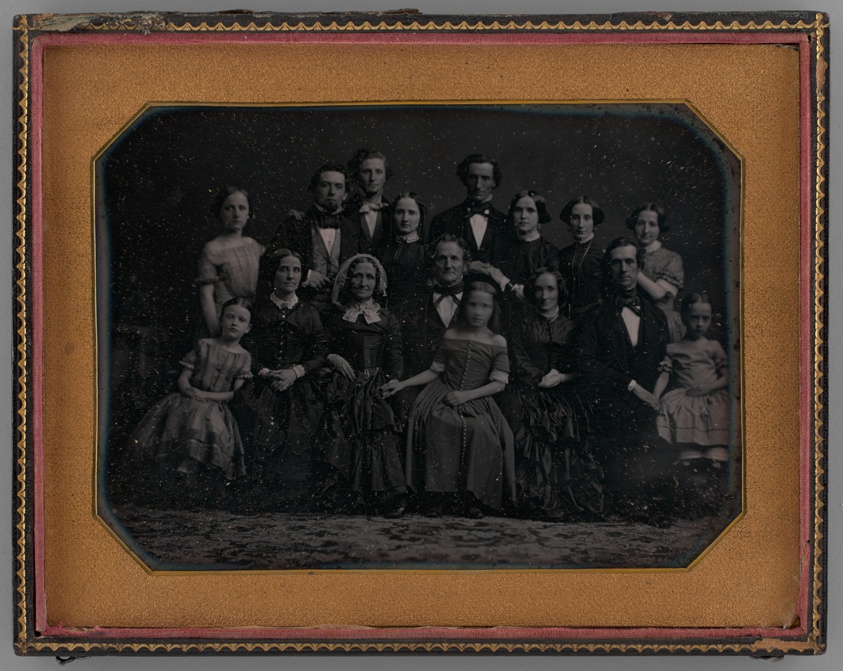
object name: Photograph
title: Untitled (Group Portrait of Men, Women, and Children)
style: 19th century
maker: Unknown maker; American, 19th century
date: 1846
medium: Daguerreotype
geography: United States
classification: portrait; photograph; photographic process; photography; portrait; daguerreotype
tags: lundberg collection, portraits, families, family, people, portrait, portraits: child subject, portraits: female subject, portraits: male subject, portraits: multiple subjects, photography